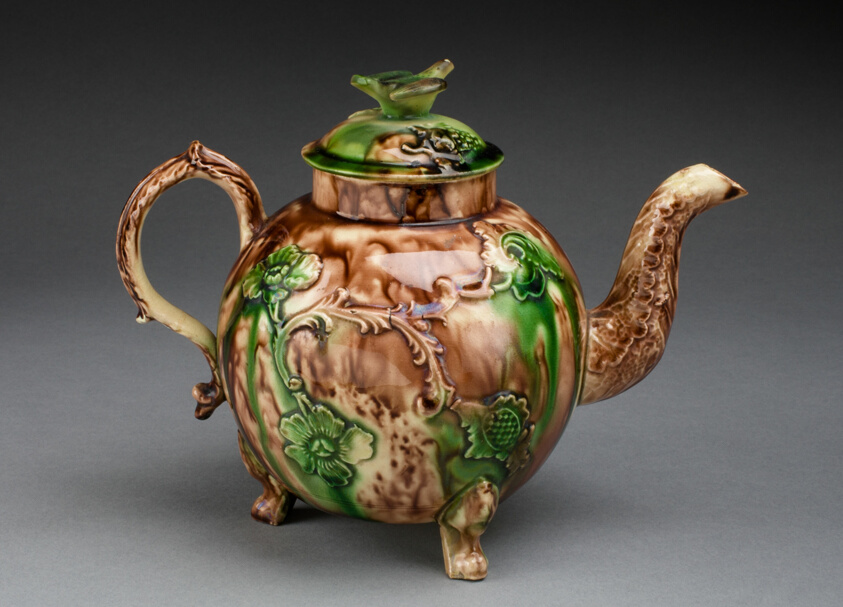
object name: Ceramics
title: Teapot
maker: Staffordshire, England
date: 1760/70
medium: Lead-glazed earthenware (creamware)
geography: Staffordshire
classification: teapot; ceramics; creamware; earthenware; european decorative arts; lead-glazed earthenware